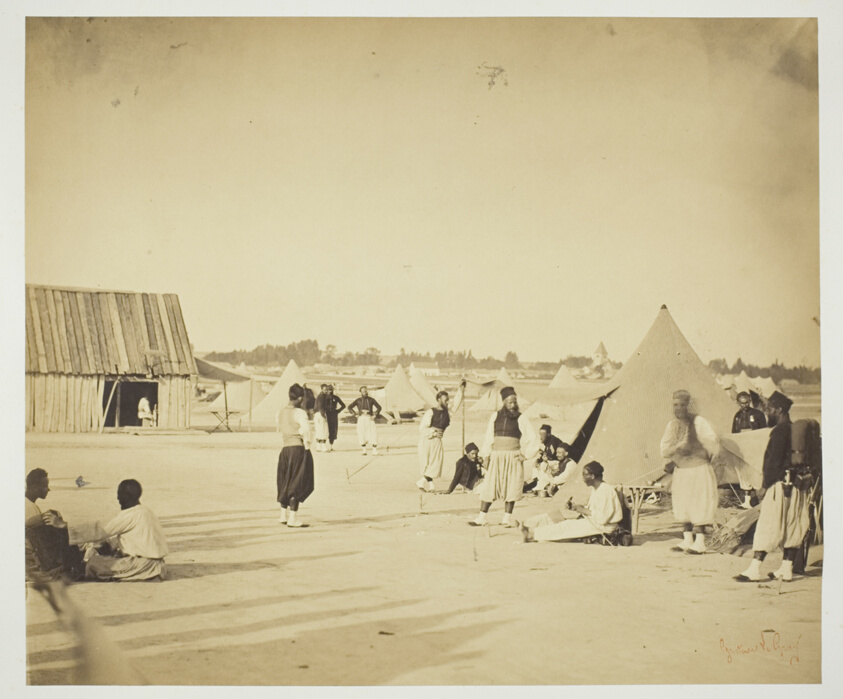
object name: Photograph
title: Untitled (Zouaves)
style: 19th century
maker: Gustave Le Gray (French, 1820–1884)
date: 1857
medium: Albumen print, from the album "Souvenirs du Camp de Châlons"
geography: France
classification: albumen silver print; photographic process; photography; photograph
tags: Paris